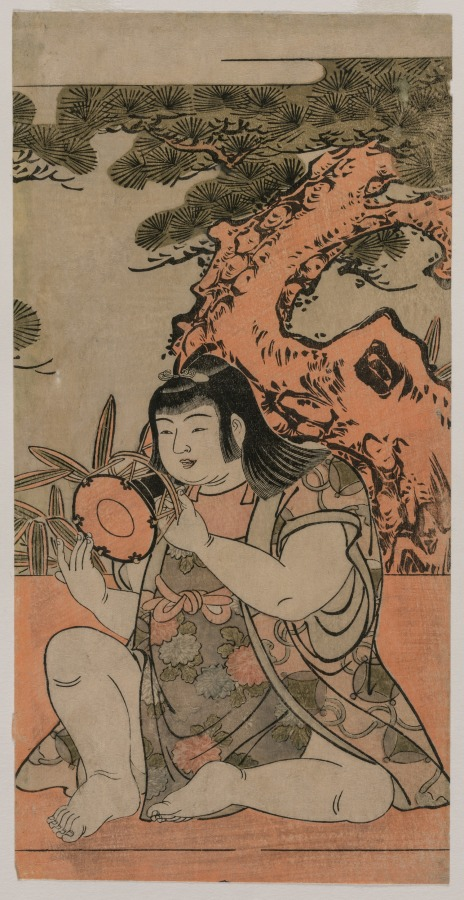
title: Doll Playing a Hand Drum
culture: Japan, Edo period (1615–1868)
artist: Kitao Shigemasa (Japanese, 1739–1819)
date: 1770s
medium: color woodblock print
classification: Print